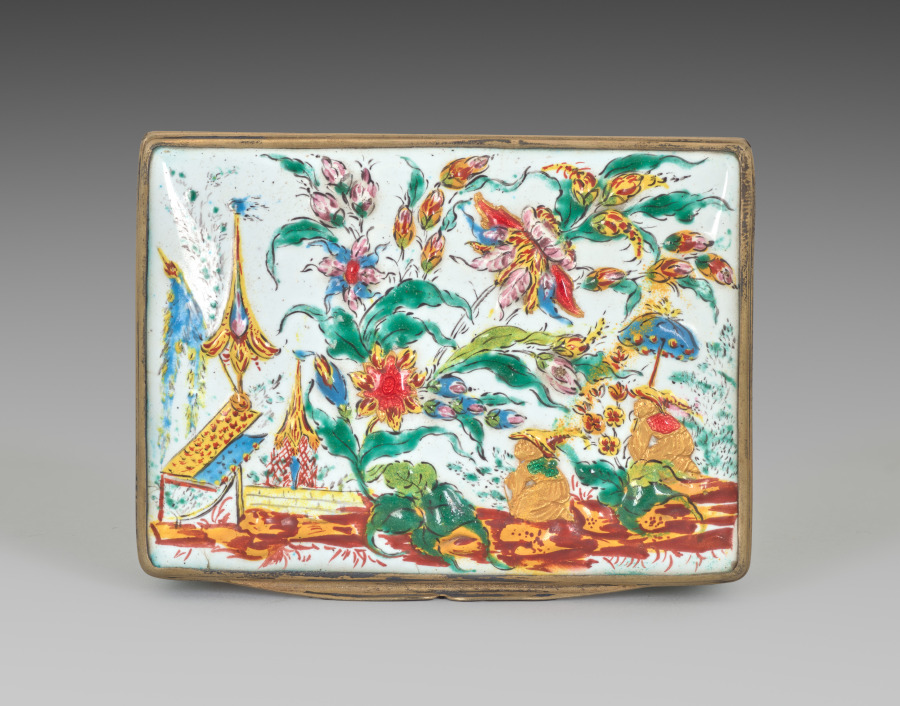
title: Box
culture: France, 18th century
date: 1749–50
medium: silver gilt and enamel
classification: Enamel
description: Chinoiserie in 18th-century France incorporated imitations of East Asian motifs, designs, and ornaments into European art. These imitations were often distorted by the European imagination and were not accurate representations of the cultures from which they drew inspiration. Elements of chinoiserie in this box can be seen primarily on the lid where enormous, vibrantly colored flowers tower over two crouching figures and a grouping of buildings.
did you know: The flower petals on the box lid are raised, an effect produced by drops of transparent enamel placed on the box’s surface that imitates polished gemstones or pearls.